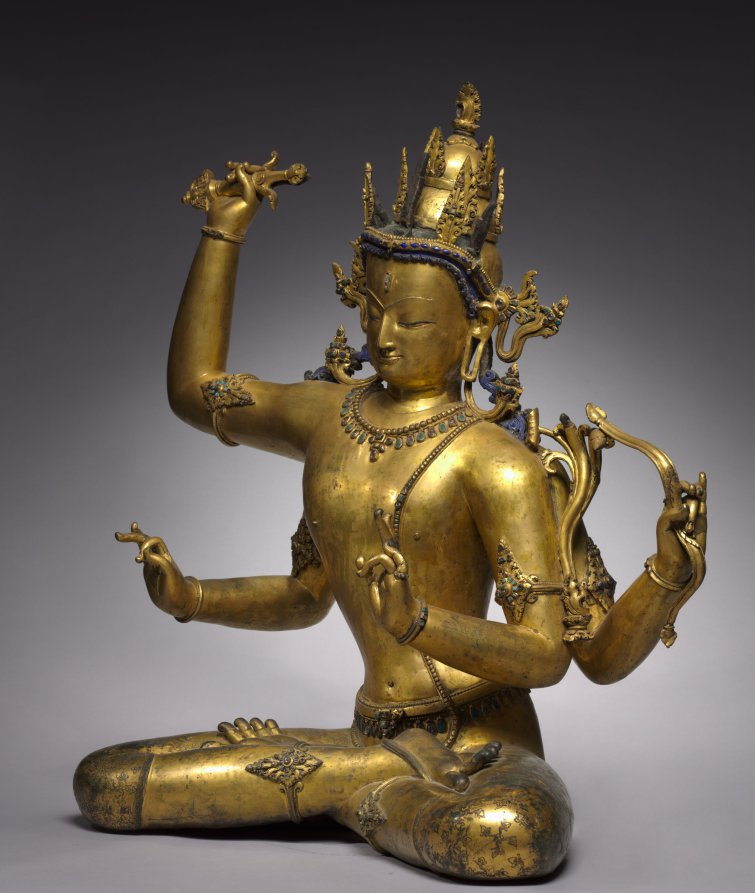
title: Bodhisattva of Wisdom (Manjushri)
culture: Nepal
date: 1400s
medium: Gilt bronze with precious and semiprecious stones, gum tempera, and cold gold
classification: Sculpture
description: This image depicts one of the main bodhisattvas, beings only one stage away from full enlightenment. Because the historical Buddha was a prince prior to his renunciation and life as a wandering ascetic, bodhisattvas are depicted as royal princes. This example has the sharp features, sweet expression, and crisp details characteristic of images made in Nepal during the 1400s. In his upraised right hand Manjushri holds the hilt of a sword that, like wisdom itself, metaphorically cuts through and defeats ignorance. His lower, rear left hand grasps a bow, once probably strung with a wire. Also missing is the arrow that he likely held in his lowered right hand. Arrows were often symbols for mantras, or strings of syllables thought to have the power to focus the mind and work like missiles to destroy negativity and affliction. The gesture of his lowered left hand indicates the transmission of Buddhist teachings. The lotus stem that rises at the left elbows originally held a book of sutras. This figure is in the yogic posture of meditation with the big toe flexed in concentration. Yoga is of central importance in tantric Buddhism, because high-level practitioners are able to discipline the body to such an extent that the mind can also be controlled.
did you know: The bodhisattva's short breeches are patterned in spiraling floral forms incised into the metal.